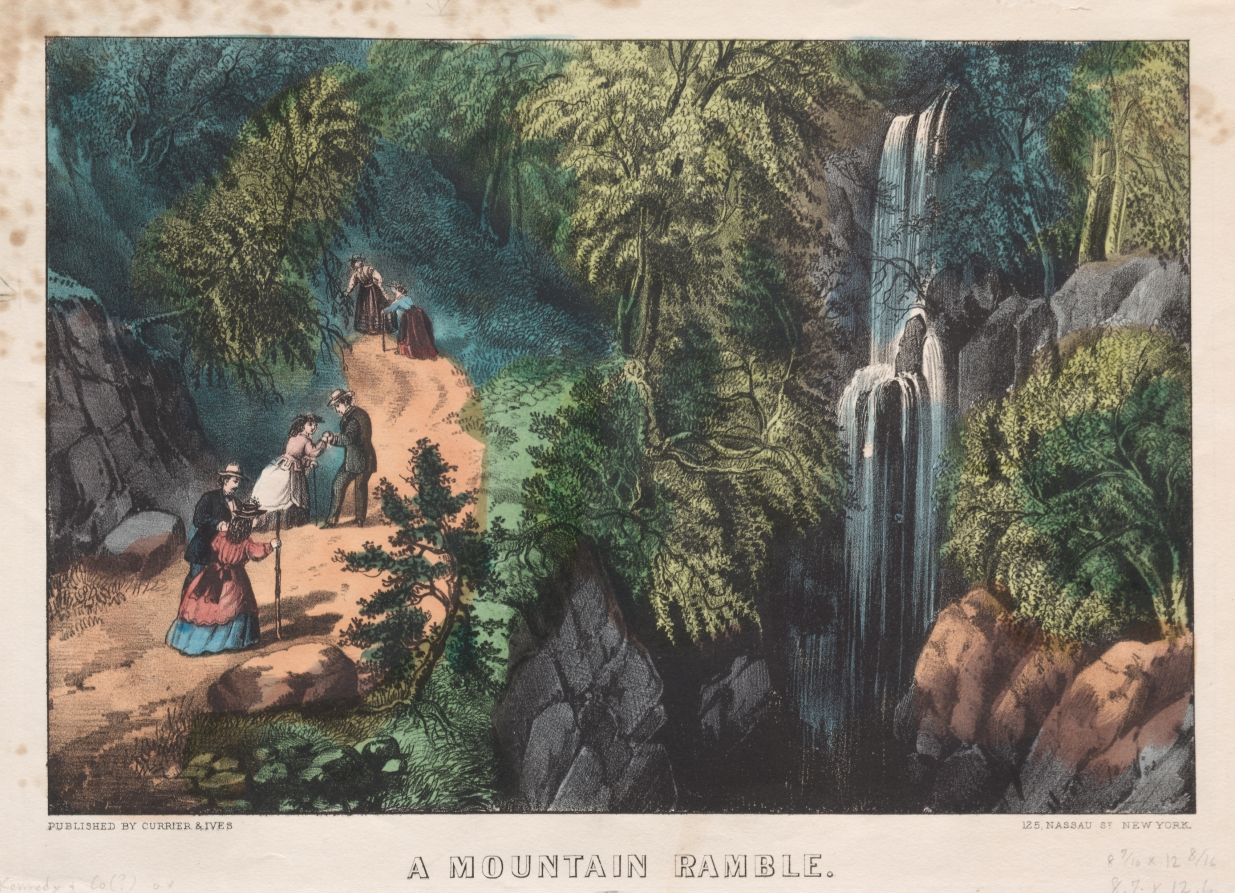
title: A Mountain Ramble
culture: America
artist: and James Merritt Ives (American, 1824–1895)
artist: Nathaniel Currier (American, 1813–1888)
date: c. 1872–74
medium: lithograph, hand colored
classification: Print